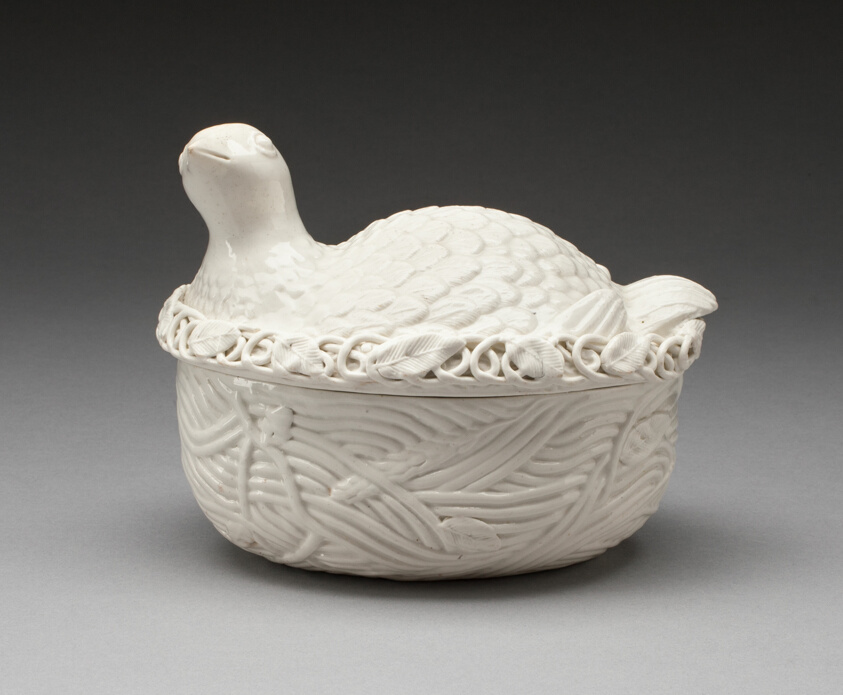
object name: Ceramics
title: Tureen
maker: Worcester Porcelain Factory (Warmstry House Period, 1751–1783); Worcester, England, founded 1751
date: c. 1760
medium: Soft-paste porcelain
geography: Worcester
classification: ceramics; tableware; porcelain; european decorative arts